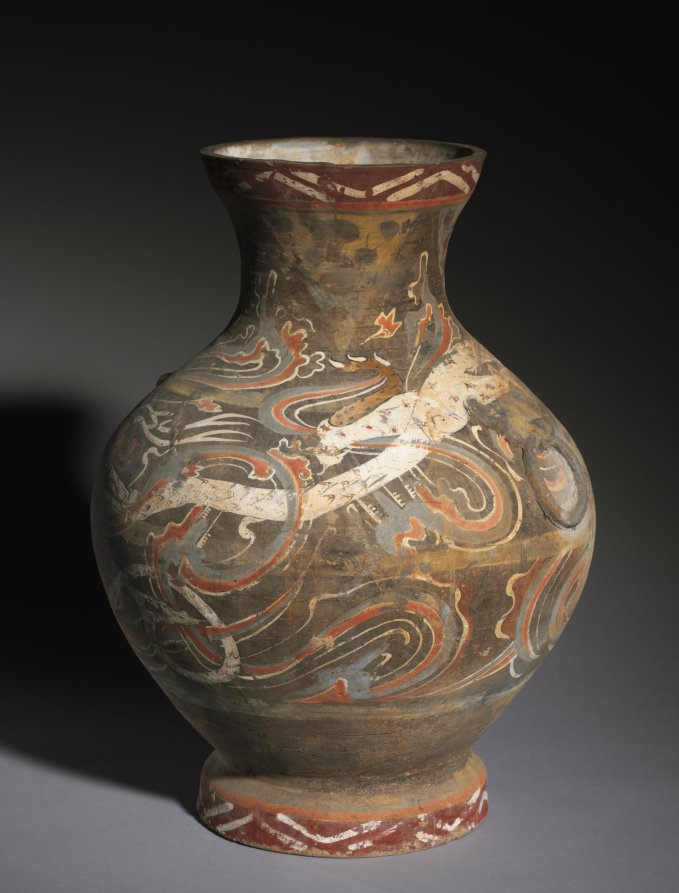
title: Jar (Hu)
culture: China, probably Henan province, Western Han dynasty (206 BCE–8 CE)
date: 202 BCE–9 CE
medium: earthenware with slip and painted decoration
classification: Ceramic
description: Instead of depicting a real landscape, the artist focused on the rhythmic forces of nature and the movement of energy, using the scrolling form as a symbol common to all changes in nature: cloud vapors, waves, and mountains alike. Here a dragon hovers among sweeping scrolls.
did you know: This earthenware wine jar's shape mimics costly bronzes, but the handles have rings that are fixed to the surface of the pot, rendering them useless.